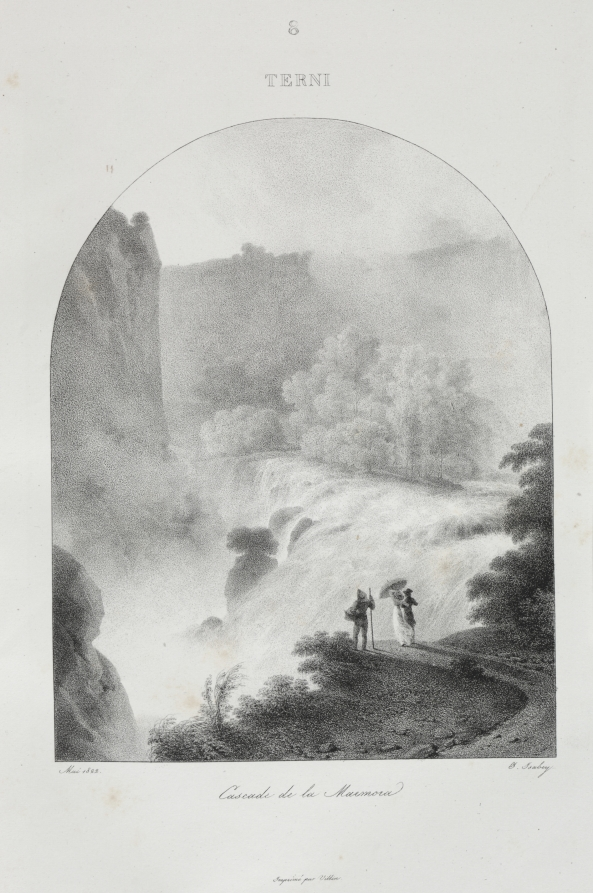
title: Voyage en Italie en 1822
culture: France, 19th century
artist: Jean-Baptiste Isabey (French, 1767–1855)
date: 1833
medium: lithograph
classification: Bound Volume